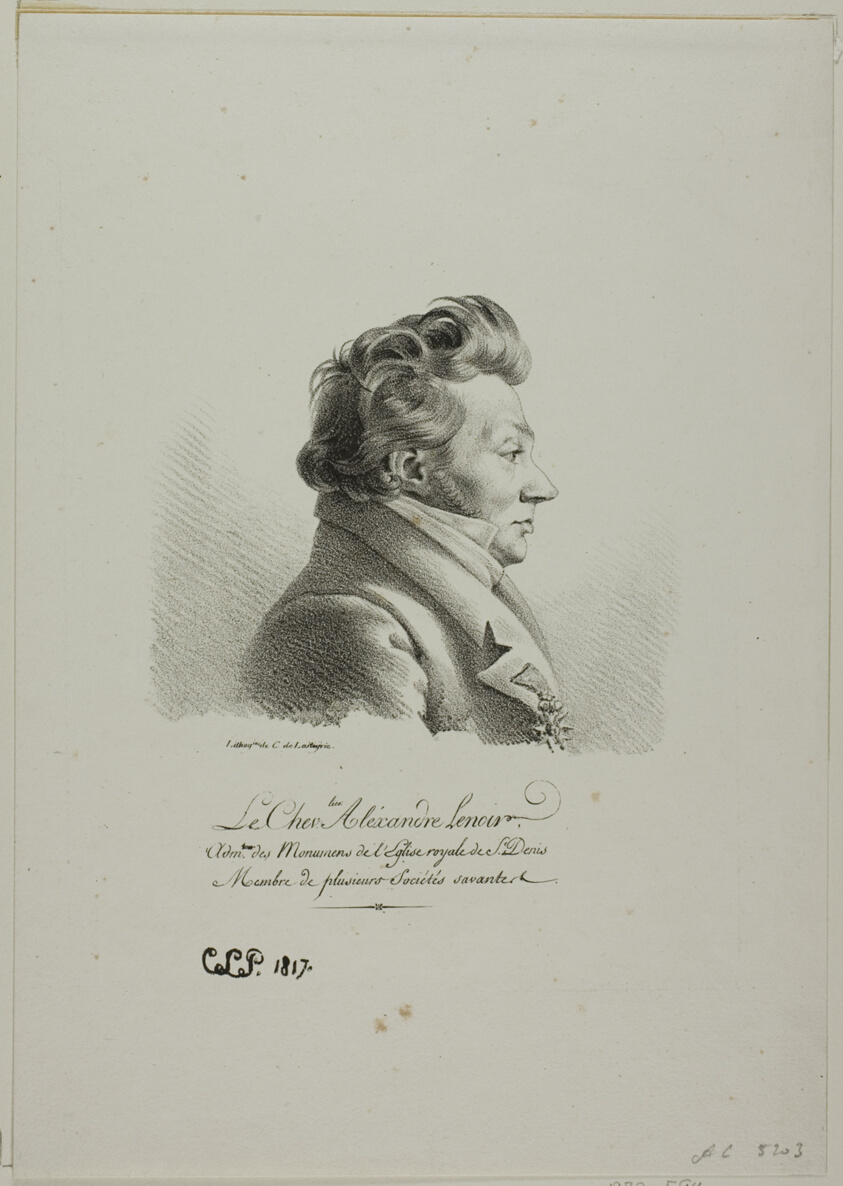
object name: Print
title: Portrait of Chevalier Alexandre Lenoir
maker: Charles Edward Crespi Le Prince (French, 1784-1855); printed by Comte de Charles Philibert Lasteyrie du Saillant (French, 1759-1849)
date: 1817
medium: Lithograph in black on ivory wove paper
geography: France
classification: lithograph; print; prints and drawing